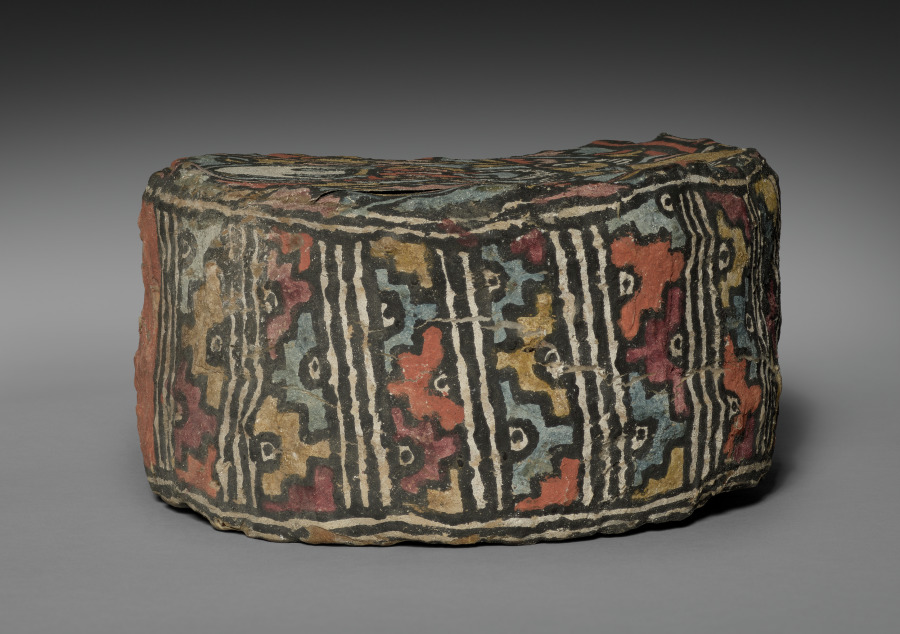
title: Painted Drum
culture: Central Andes, Middle Horizon, North Coast?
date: 500–1000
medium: Animal hide, gesso, wooden slats, pigment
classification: Musical Instrument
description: In the 1600s, music was so important to Indigenous Andean ceremonial life that Spaniards destroyed thousands of musical instruments to hasten Natives’ conversion to Christianity. The number of surviving, older instruments suggests that music had similar import in earlier periods. This rare example is painted with a figure wearing a crescent headdress, an emblem of status; it may have been played by a woman.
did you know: This painted drum may have been played by a woman in antiquity.